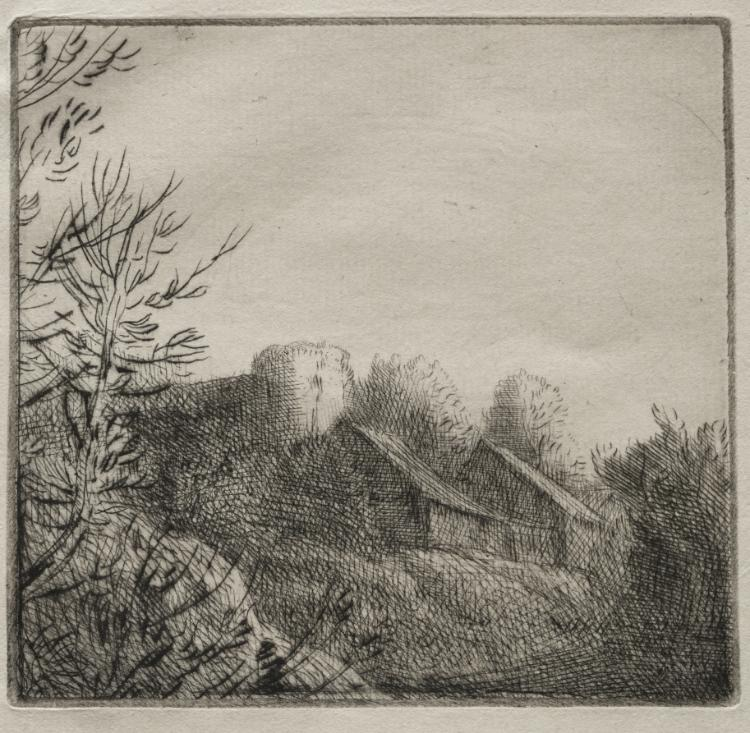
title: Farm at Valoux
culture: France, 19th century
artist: Alphonse Legros (French, 1837–1911)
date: c. 1857–1911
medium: drypoint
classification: Print